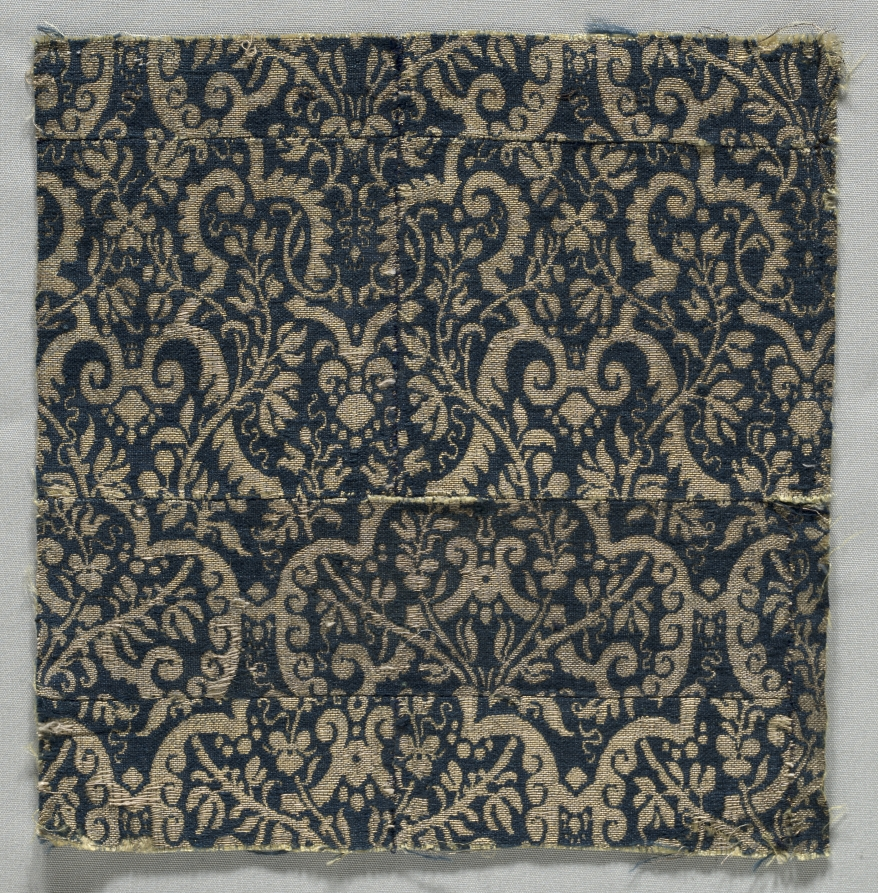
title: Textile Fragment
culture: Italy, 17th century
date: 1600s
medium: lampas weave (?)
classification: Textile